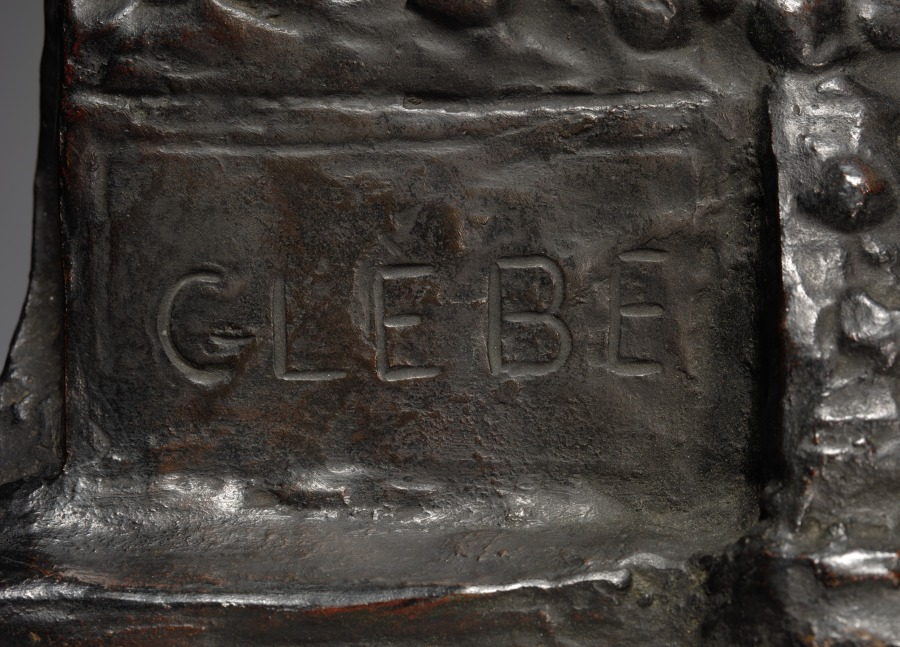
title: The Soil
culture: Belgium, 19th century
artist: Constantin Meunier (Belgian, 1831–1905)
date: c. 1890 – 1900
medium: bronze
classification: Sculpture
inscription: Signed right: "C. Meunier"; inscribed lower right front: "B. Verbeyot, Fondeur, Bruxelles."; lower left: "GLEBE"